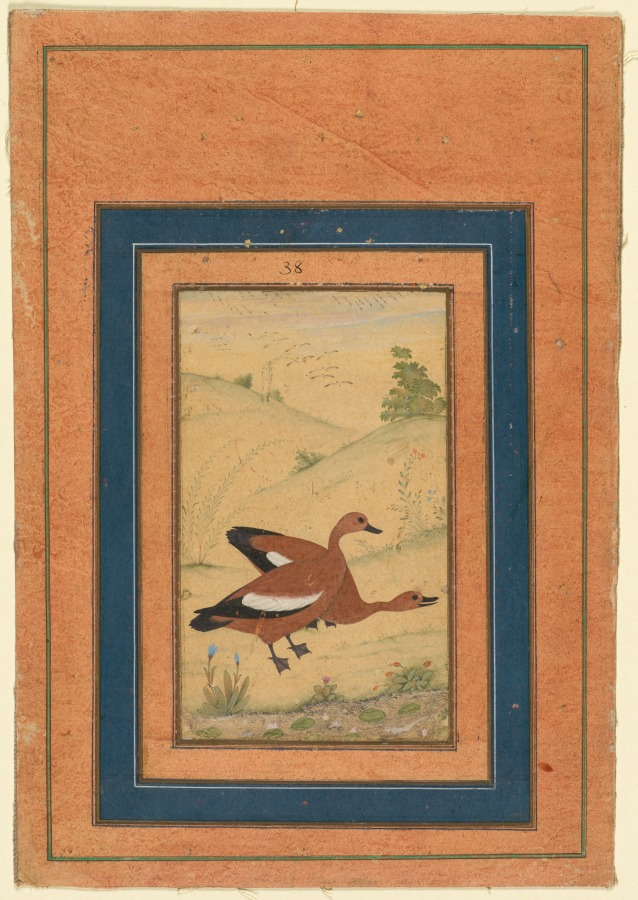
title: A pair of Brahminy ducks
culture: India, Mughal, 16th century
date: c. 1595; borders added probably 1800s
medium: Gum tempera on paper, mounted with later pink and blue borders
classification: Painting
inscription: Inscription above painting, Arabic numerals: 38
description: The Brahminy duck, also known as the ruddy shelduck, can be found throughout Southern Europe, North Africa, and Southeast Asia. This painting accurately depicts the orange coloring of Brahminy ducks and the patches of white on their wings. They are also recognizable by their long legs and short bills. The level of detail in realistic paintings of animals like this one suggests that Mughal artists studied live subjects, such as the waterfowl that lived in Mughal palace gardens.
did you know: Delicate dots articulate the texture of webbed feet and toothy row in the beak.